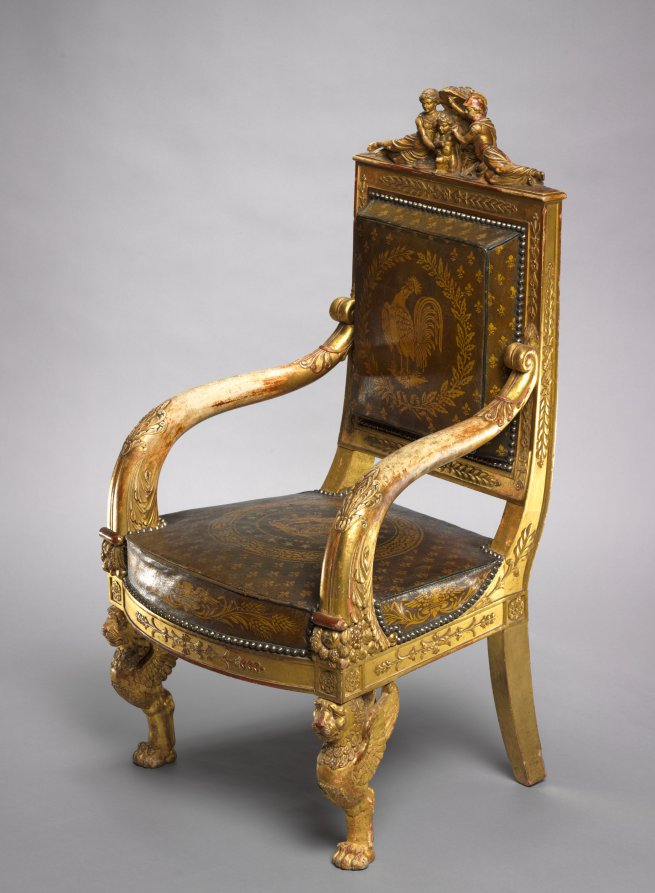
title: Child's Throne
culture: France, Paris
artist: Pierre-Marie Balny le Jeune (French, 1832)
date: 1822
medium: carved and gilded wood, leather upholstery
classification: Furniture and woodwork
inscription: inscribed with stencils inside back rail: BLONDEL TAPISSIER/RUE ST. ANTOINE N 72 1822 inscribed in ink lower edge back rail: 12 JANVIER 18[22?]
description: This chair was made for the young, presumed successor to the French throne who ruled briefly as Henri V in 1830, the last of the direct Bourbon line. He is depicted at the center of the top rail protected by female figures representing France and Minerva, the Roman goddess of wisdom. Fleurs-de-lis and the Gallic rooster, symbols of French royalty and the French people, decorate the upholstery.